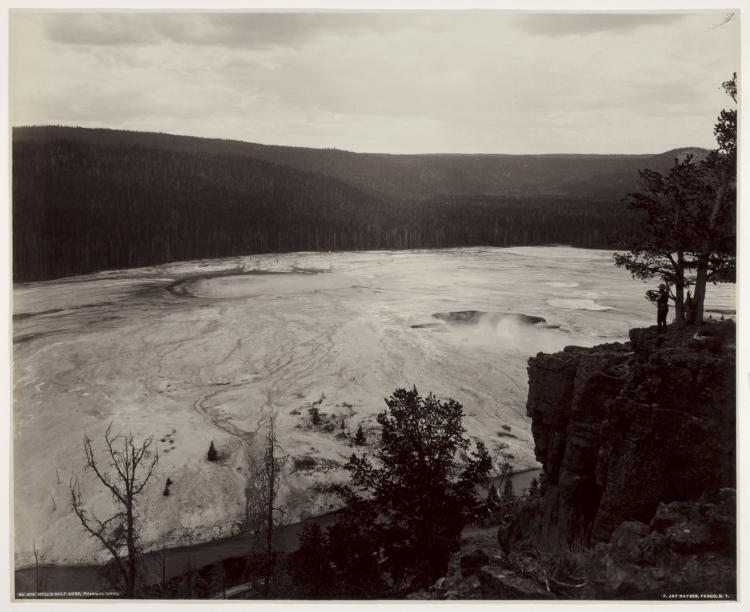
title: Hell's Half Acre, Prismatic Springs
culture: America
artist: Frank Jay Haynes (American, 1853–1921)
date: c. late 1880s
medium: albumen print from glass negative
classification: Photograph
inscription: Written in negative: "No. 3110 HELL'S HALF ACRE, Prismatic Springs / F. J. HAYNES, FARGO, D.T."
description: Frank Jay Haynes was a photographer of life in the American West and the early days of Yellowstone National Park. Arriving in Yellowstone in the 1880s, he accompanied expeditions into the park, serving as official photographer. From canyon bottoms to mountain peaks, Haynes took his cameras to locations where he could capture unique and artistic views. In this photograph, he documented the immense space of the landscape, made particularly apparent by the inclusion of a small figure standing on the cliff at the right.